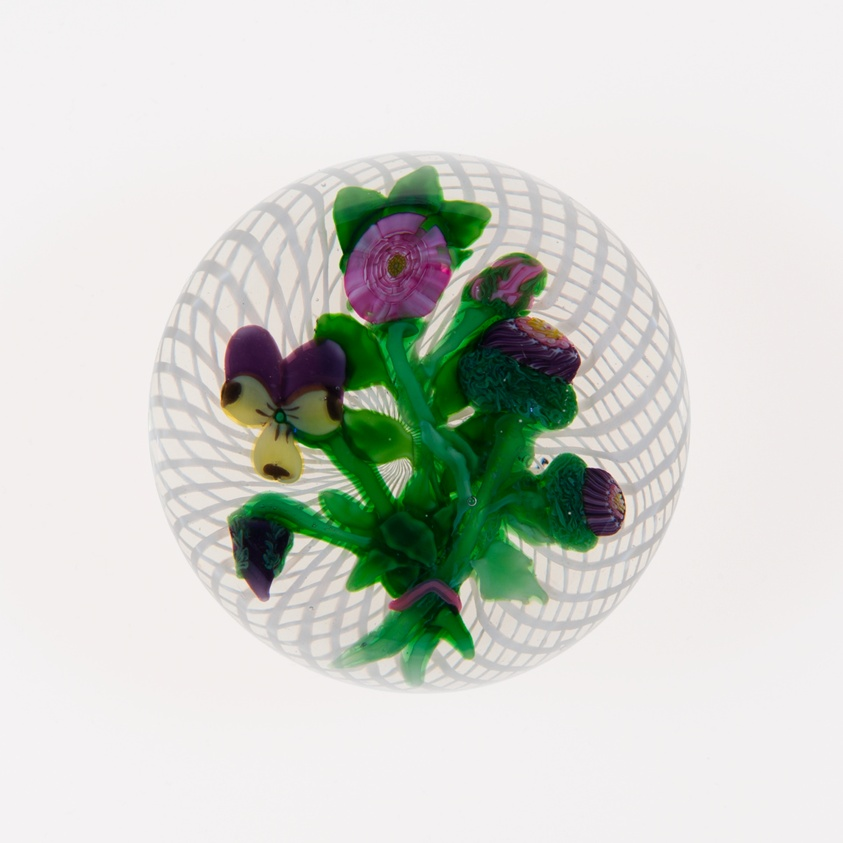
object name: Glass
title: Paperweight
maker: Clichy Glassworks (Cristalleries de Clichy); Clichy, France, 1837-1885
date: c. 1845–60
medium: Glass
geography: Clichy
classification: paperweight; glass